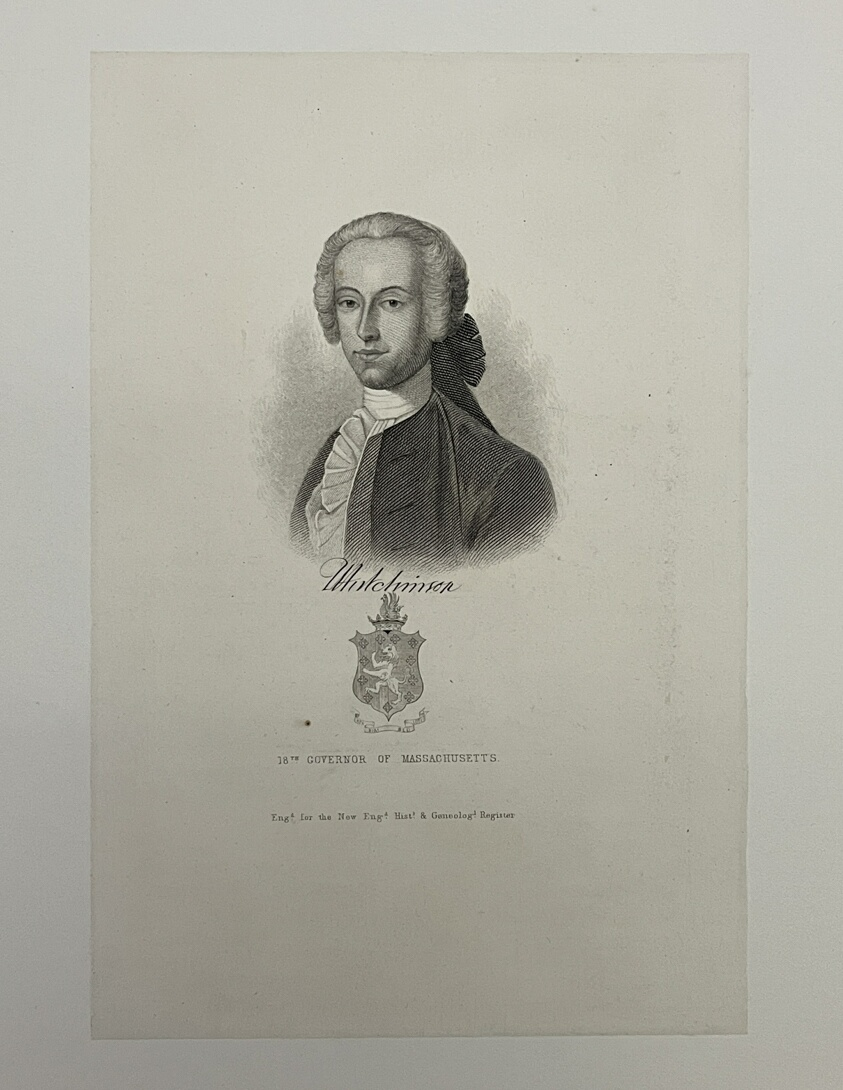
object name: Print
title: Thomas Hutchinson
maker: Artist Unknown (Likely American, 19th century)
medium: Steel engraving on paper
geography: United States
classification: reproduction; print; prints and drawing